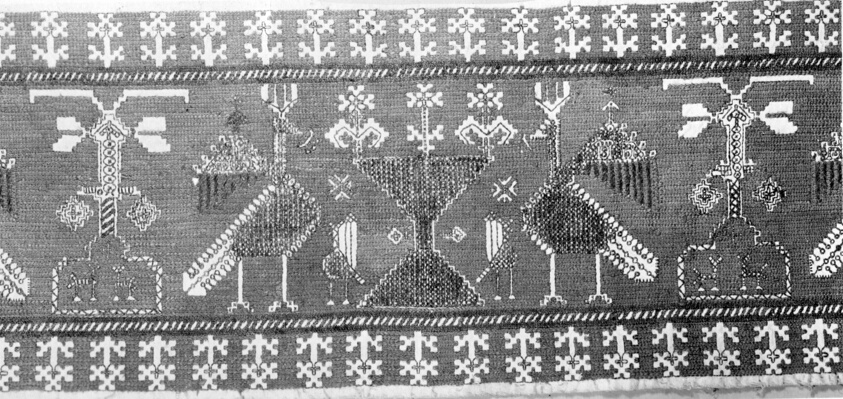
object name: Textile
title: Fragment (Border)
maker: Morocco, Azemmour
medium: Silk embroidery on plain, cream-colored cotton cloth rather coarse. Stitch: long armed cross-stitch, Holbein stitch, herringbone stitch, cross on one side, square on the other side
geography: Morocco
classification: textile; needlework (visual works); weaving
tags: morocco